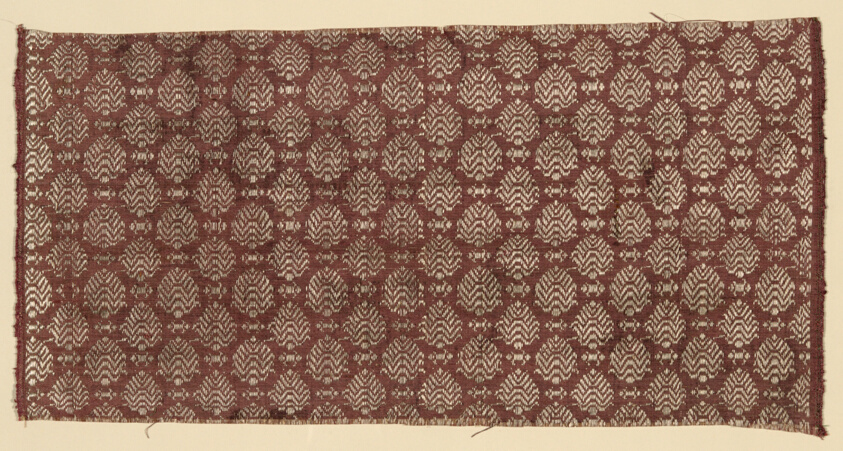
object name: Textile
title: Fragment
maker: Italy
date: 1650/1700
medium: Silk, plain compound cloth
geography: Italy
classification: textile; weaving